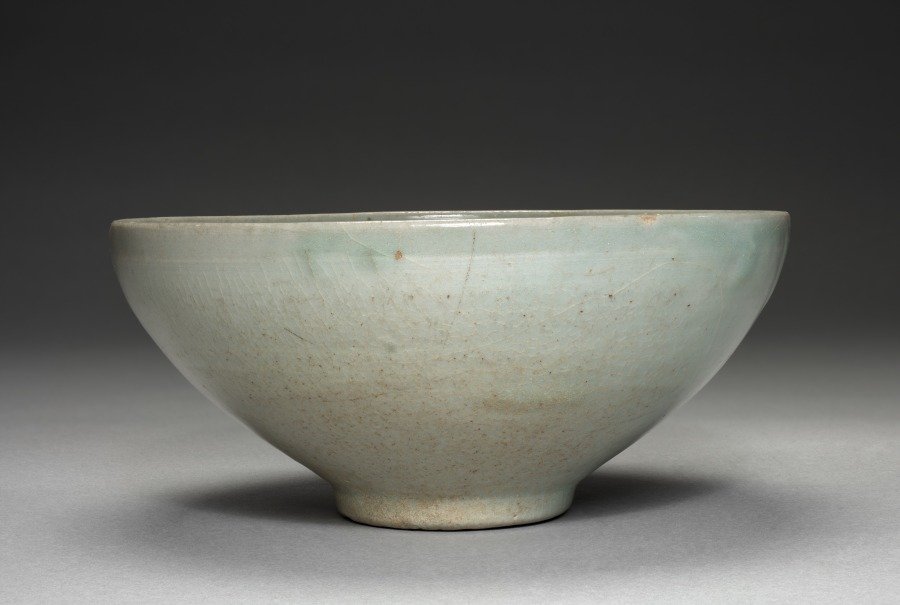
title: Bowl with Incised Parrot Design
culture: Korea, Goryeo dynasty (918–1392)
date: 1100s-1200s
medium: glazed porcelain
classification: Ceramic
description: As early as the 600s, the practice of drinking tea and wine became an important part of elite leisure culture in Korea. A wide bowl like this example was especially suitable for drinking powdered tea shaved from a compressed tea cake, the most commonly enjoyed type during the Goryeo period. The image of flying parrots inscribed on the inner wall of this tea bowl may have made the moment of drinking tea much enjoyable.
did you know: On the base of this tea bowl, three small spur marks made of bits of clay remain visible, indicating an individual protective casing of fire clay (saggar).